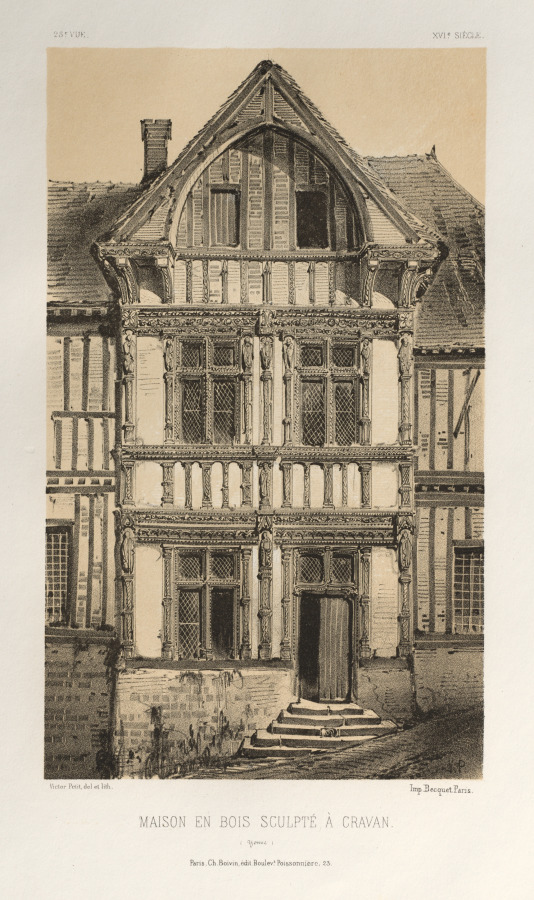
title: Architecture Pittoresque ou Monuments des xveme. Et xvieme. Siecles: Chateaux De France des XV et XVI Siecles: Pl. 25, Maison En Bois Sculpte A Cravan (Yonne)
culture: France, 19th century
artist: Victor Petit (French, 1817–1874)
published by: Charles Boivin (publisher and editor); Lith de Godard a Paris (printer)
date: published 1860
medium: lithograph with tint stone, from portfolio of 100 lithographs with tint stone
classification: Print